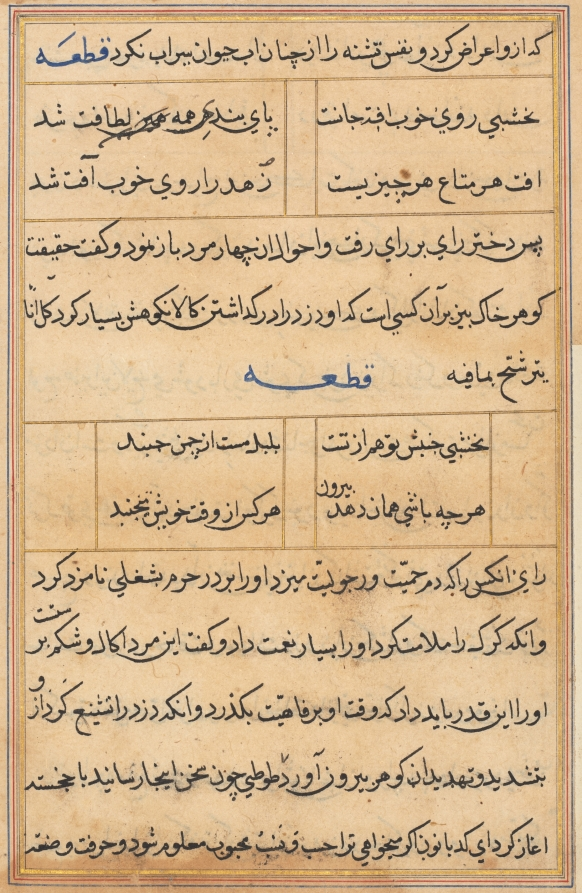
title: Page from Tales of a Parrot (Tuti-nama): text page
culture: Mughal India, court of Akbar (reigned 1556–1605)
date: c. 1560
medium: gum tempera, ink, and gold on paper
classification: Painting